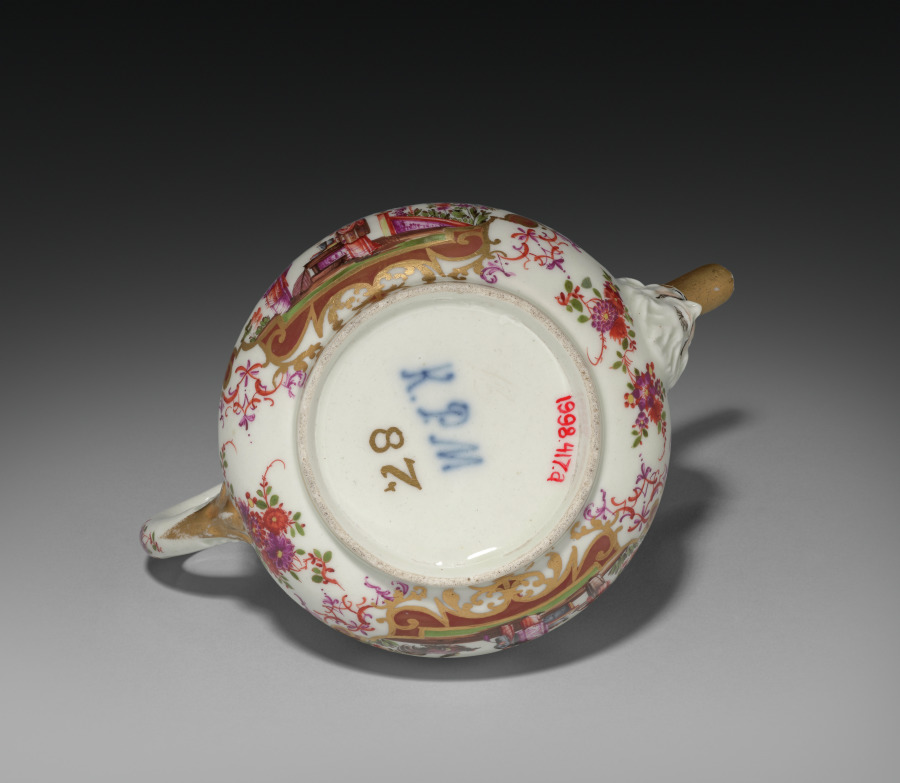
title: Tea Pot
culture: Germany, Meissen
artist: Meissen Porcelain Factory (German, est. c. 1710)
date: c. 1723–24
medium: gilt porcelain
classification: Ceramic